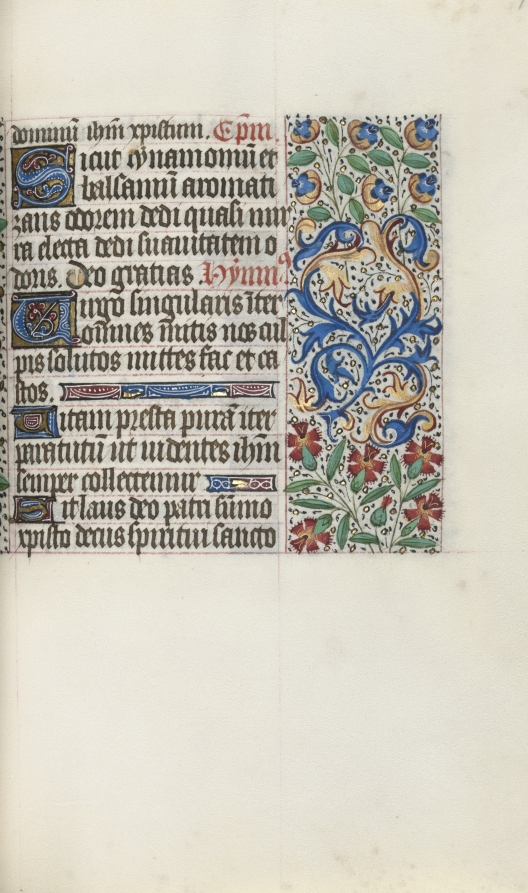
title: Book of Hours (Use of Rouen): fol. 78r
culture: France, Rouen, 15th century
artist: Master of the Geneva Latini (French, active Rouen, 1460–80)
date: c. 1470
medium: ink, tempera, and gold on vellum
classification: Bound Volume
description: In the late 1400s and early 1500s Rouen was an established and important center of book production. The city’s cathedral had a wealthy chapter that spent large sums of money to commission books and to maintain its extensive library. The stationers and booksellers would have likely been concentrated in or near the cathedral precinct. This artist, named after a manuscript now in Geneva, was Rouen’s principal illuminator during the second half of the 1400s.